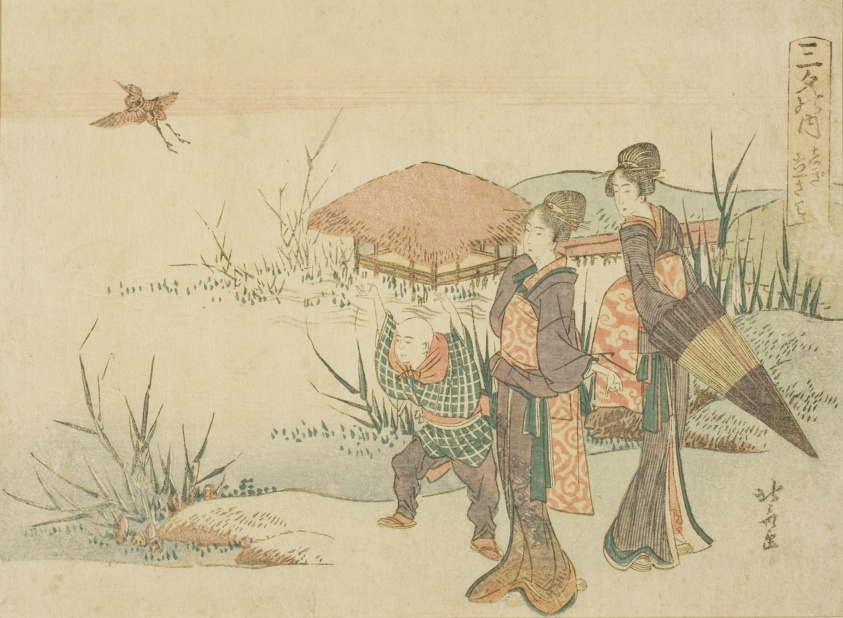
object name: Print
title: The Marsh Where the Snipe Takes Flight (Shigi tatsu sawa), from the series "Three Evening Poems (Sanseki no uchi)"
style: Japanese (culture or style)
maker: Katsushika Hokusai 葛飾 北斎; Japanese, 1760-1849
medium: Color woodblock print; kokonotsugiri-ban, surimono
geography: Japan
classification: woodblock print; print; asian art